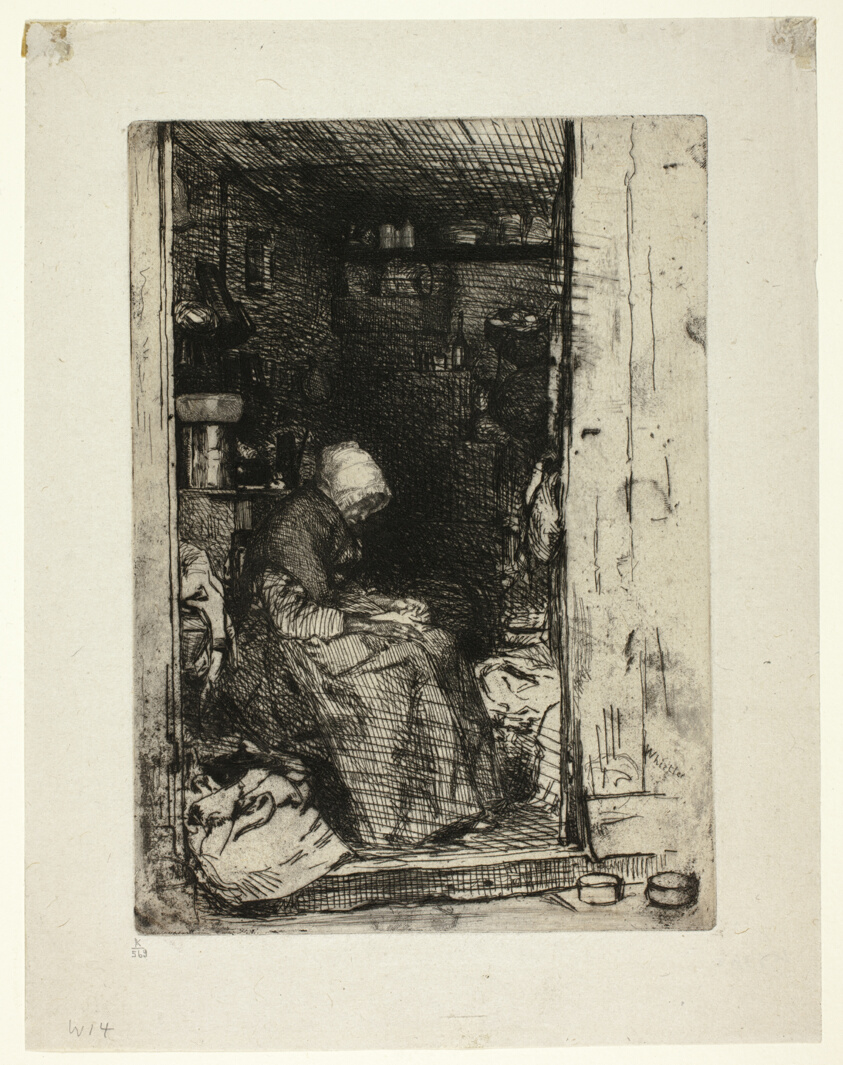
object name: Print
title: La Vieille aux Loques (The Old Woman with Rags)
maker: James McNeill Whistler (American, 1834-1903)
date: 1858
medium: Etching and drypoint with foul biting in black ink on light gray China paper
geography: United States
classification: etching; foul biting; print; prints and drawing; paper; drypoint